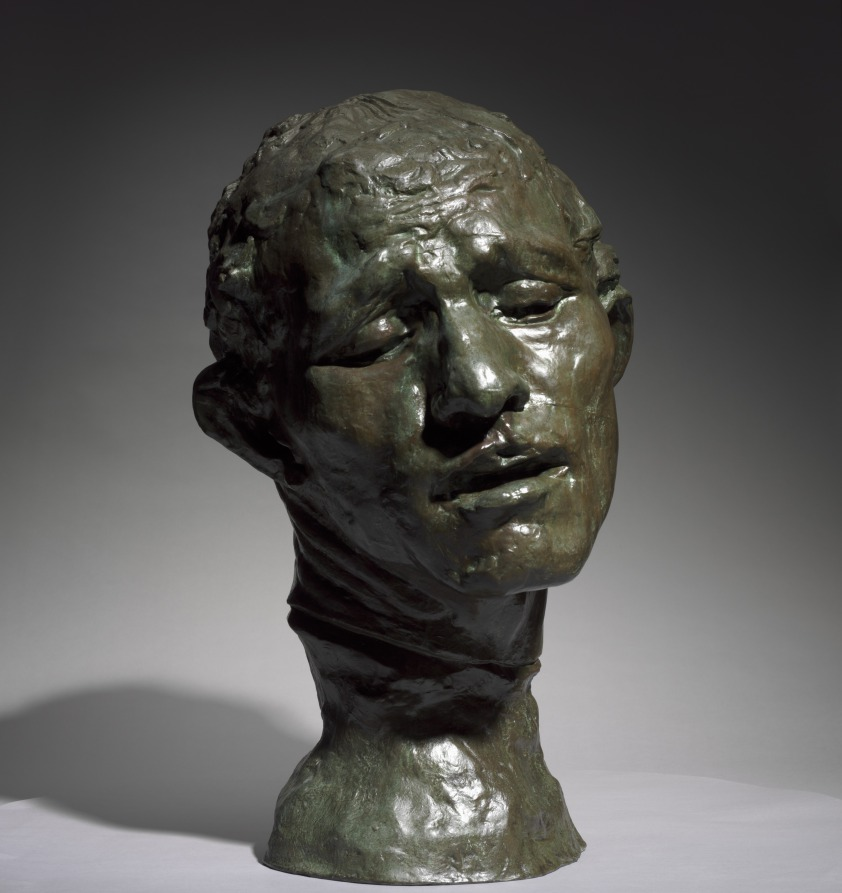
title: Heroic Head of Pierre de Wissant, One of the Burghers of Calais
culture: France, 19th century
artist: Auguste Rodin (French, 1840–1917)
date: 1886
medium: bronze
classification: Sculpture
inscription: inscribed at neck, left: A.Rodin; inscribed lower back: Alexis Rudier/Fondeur-Paris.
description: This sculpture depicts one of the figures in Rodin’s large public monument The Burghers of Calais (1884–89), featuring six French men who volunteered to be taken prisoner by the English in exchange for lifting the siege of Calais during the Hundred Years War (1337–1453). Pierre de Wissant’s anguished expression suggests extreme mental suffering as he contemplates his expected execution. Rodin exhibited a life-size version of the figure as an independent work before completing the monument. He later made multiple versions in various sizes and media.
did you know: This sculpture depicts the head of a figure from Rodin's large public monument The Burghers of Calais (1884-89). The CMA also owns a plaster version of the head.